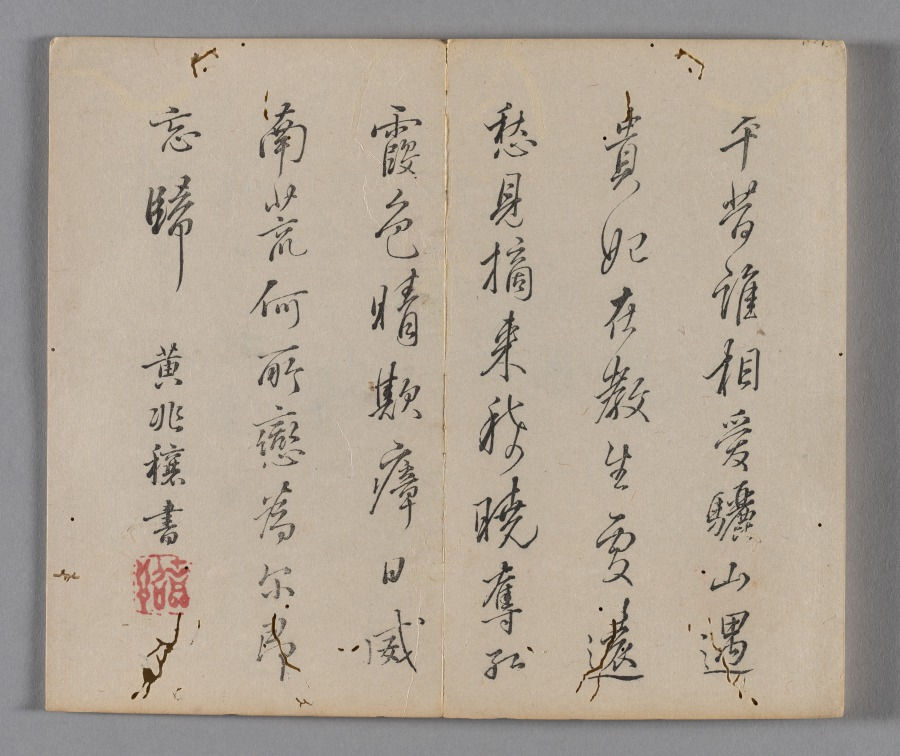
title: Ten Bamboo Studio Collection of Calligraphy and Painting: Miscellaneous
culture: China, Qing dynasty (1644-1911)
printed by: Hu Zhengyan (Chinese, c. 1584–1674)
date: 1633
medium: Woodblock-printed book; ink and colors on paper; first edition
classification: Print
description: Color printing reached a level of perfection in the early 1600s, as seen in this Ten Bamboo Studio Collection of Calligraphy and Painting and the Mustard Seed Garden Manual of Painting (printed 1679 and 1701). The painterly quality, precision in registering (aligning) the woodblocks, and harmonious colors made them the most successful color print editions in Chinese history. Both editions were printed and compiled in Nanjing, spread nationwide, and had a great impact on the arts in Japan and Korea.